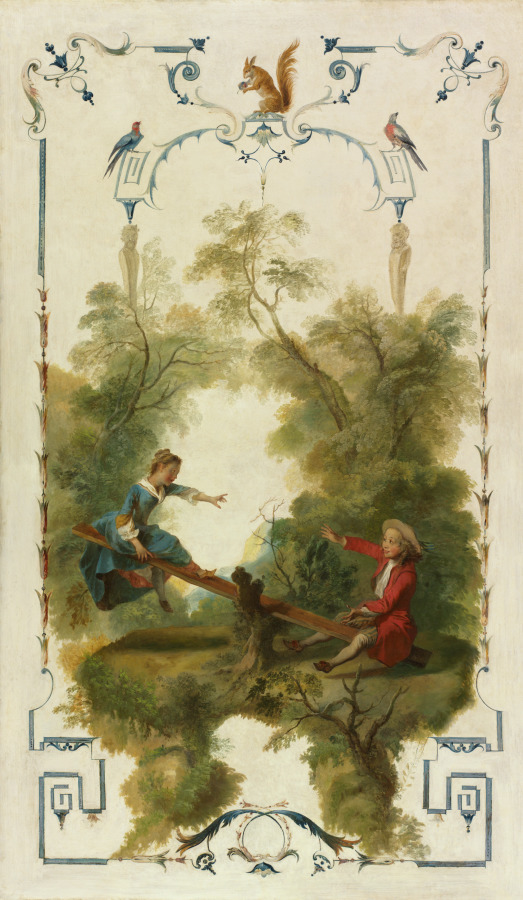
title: The See-Saw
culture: France, 18th century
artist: Nicolas Lancret (French, 1690–1743)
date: c. 1723–1727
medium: oil on canvas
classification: Painting